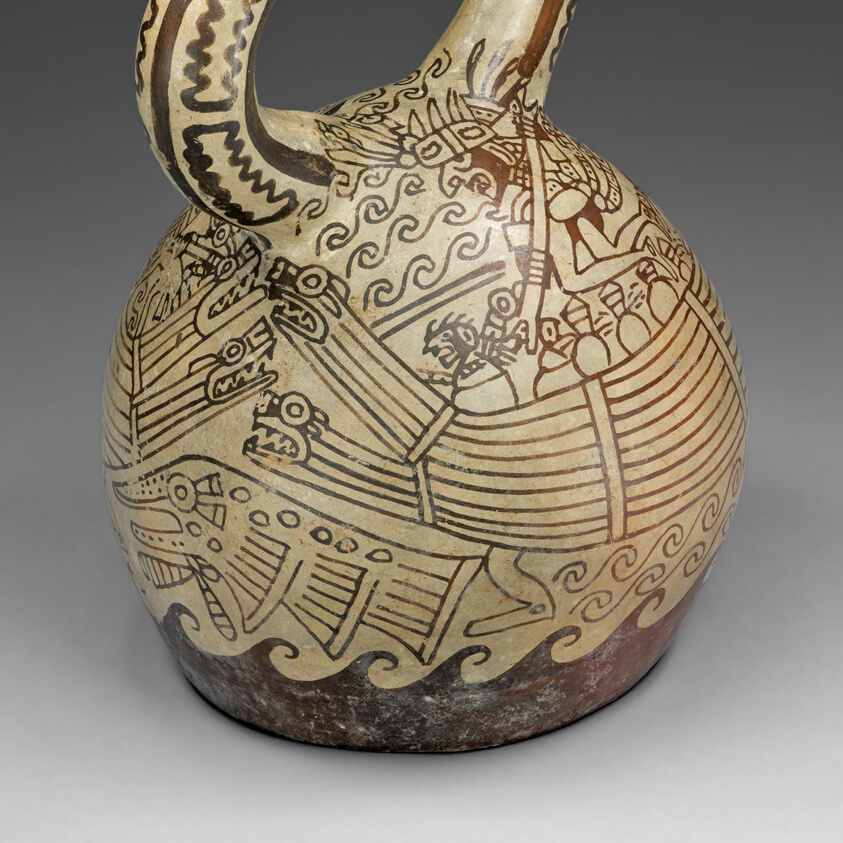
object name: Vessel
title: Stirrup Vessel with Fineline Painting Depicting a Figures in Reed Boat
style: moche, mochica v, mochica, early intermediate period, Pre-Columbian, americas, Arts of the Americas, andean, andes, south american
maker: Moche (North coast, Peru)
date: 100 BCE–500 CE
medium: Ceramic and pigment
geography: Peru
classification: earthenware; ceramics; vessel; art of the americas